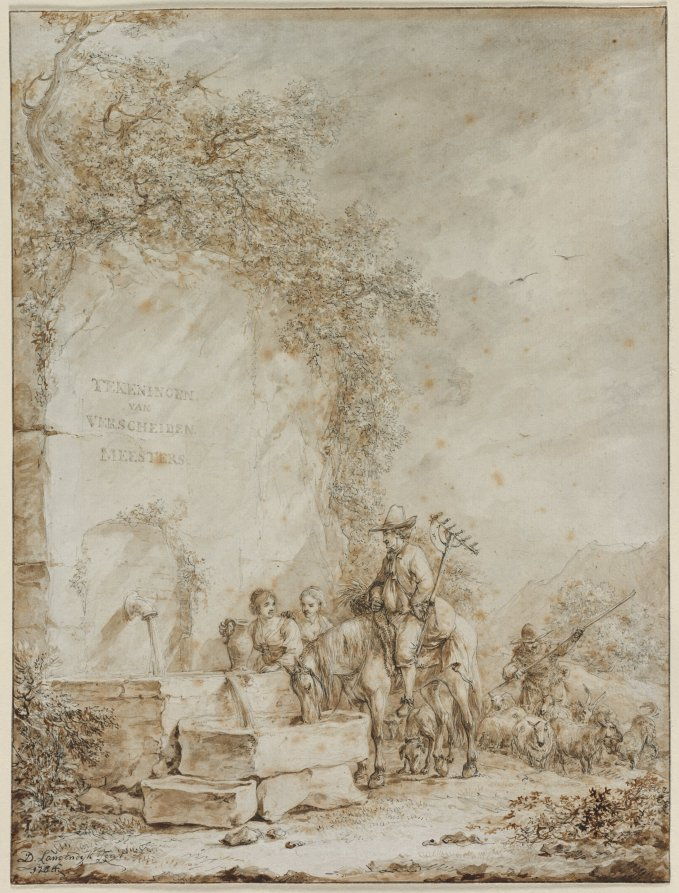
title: Frontispiece for an Album of Drawings: Peasants at a Fountain (recto)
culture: Netherlands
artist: Dirk Langendijk (Dutch, 1748–1805)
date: 1784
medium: pen and black ink and brush and brown and gray wash over graphite; framing lines in black ink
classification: Drawing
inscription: signed, lower left, in black ink: D. Langendyk Fecit / 1784 ; by artist, center left, in graphite reinforced with brush and brown wash: TEKENINGEN / VAN / VERSCHEIDEN / MEESTERS [=Drawings by Various Masters]